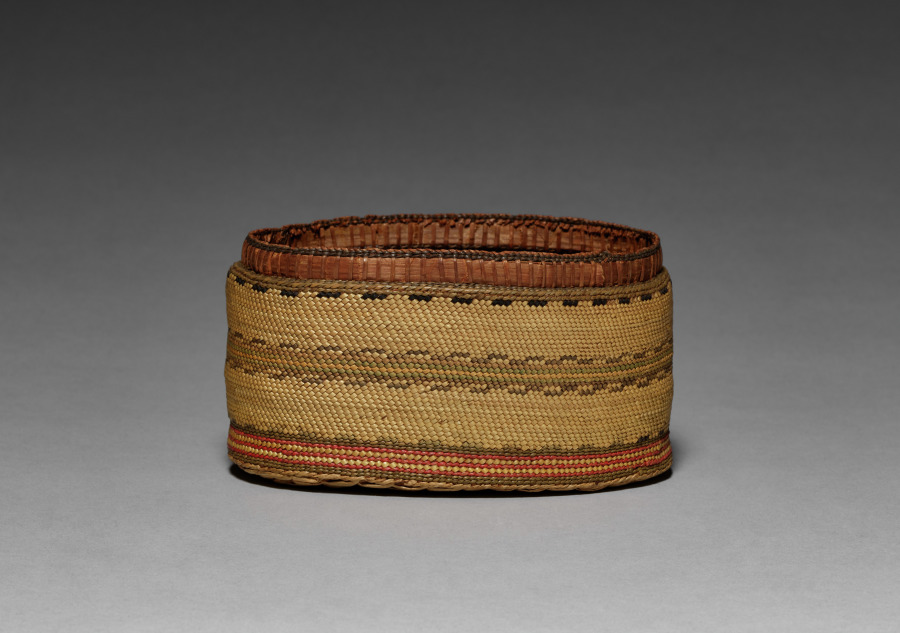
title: Lidded Bowl (lid)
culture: Northwest Coast, Vancouver Island, early 20th century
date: c 1900– 1925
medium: twined grass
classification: Basketry